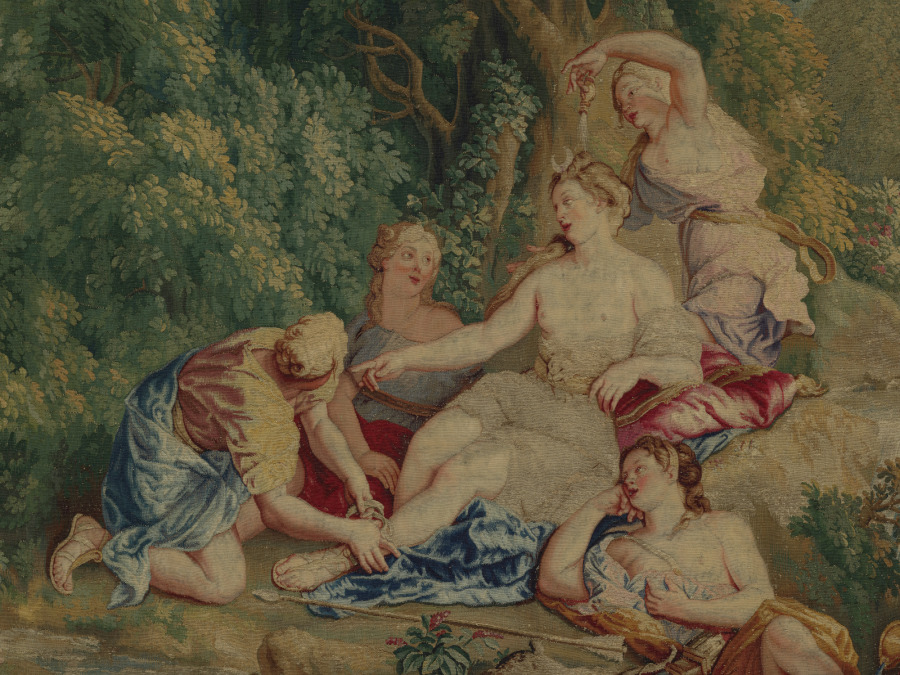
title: Diana's Return from the Chase (from Set of Ovid's Metamorphoses)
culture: France, 18th century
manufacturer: Gobelins Manufactory (France, Paris, est. 1662)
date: 1704–1731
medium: tapestry weave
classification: Tapestry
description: This tapestry’s elaborate border emulates a gilt picture frame, a key characteristic of eighteenth-century Gobelins tapestries. It portrays the goddess Diana at two distinct moments, during and following the hunt, the first accompanied by three dogs, and the second reclining among five attendants. The figures are positioned in a lush landscape near a small stream. A putto, poised to place an arrow in his bow, hovers above Diana. Goddess of the hunt and associated with wild animals and the moon, Diana can be identified by the crescent worn above her forehead. The dead hares indicate a successful hunt.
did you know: During the French Revolution, Gobelins tapestries were sometimes disassembled to harvest the gold threads.